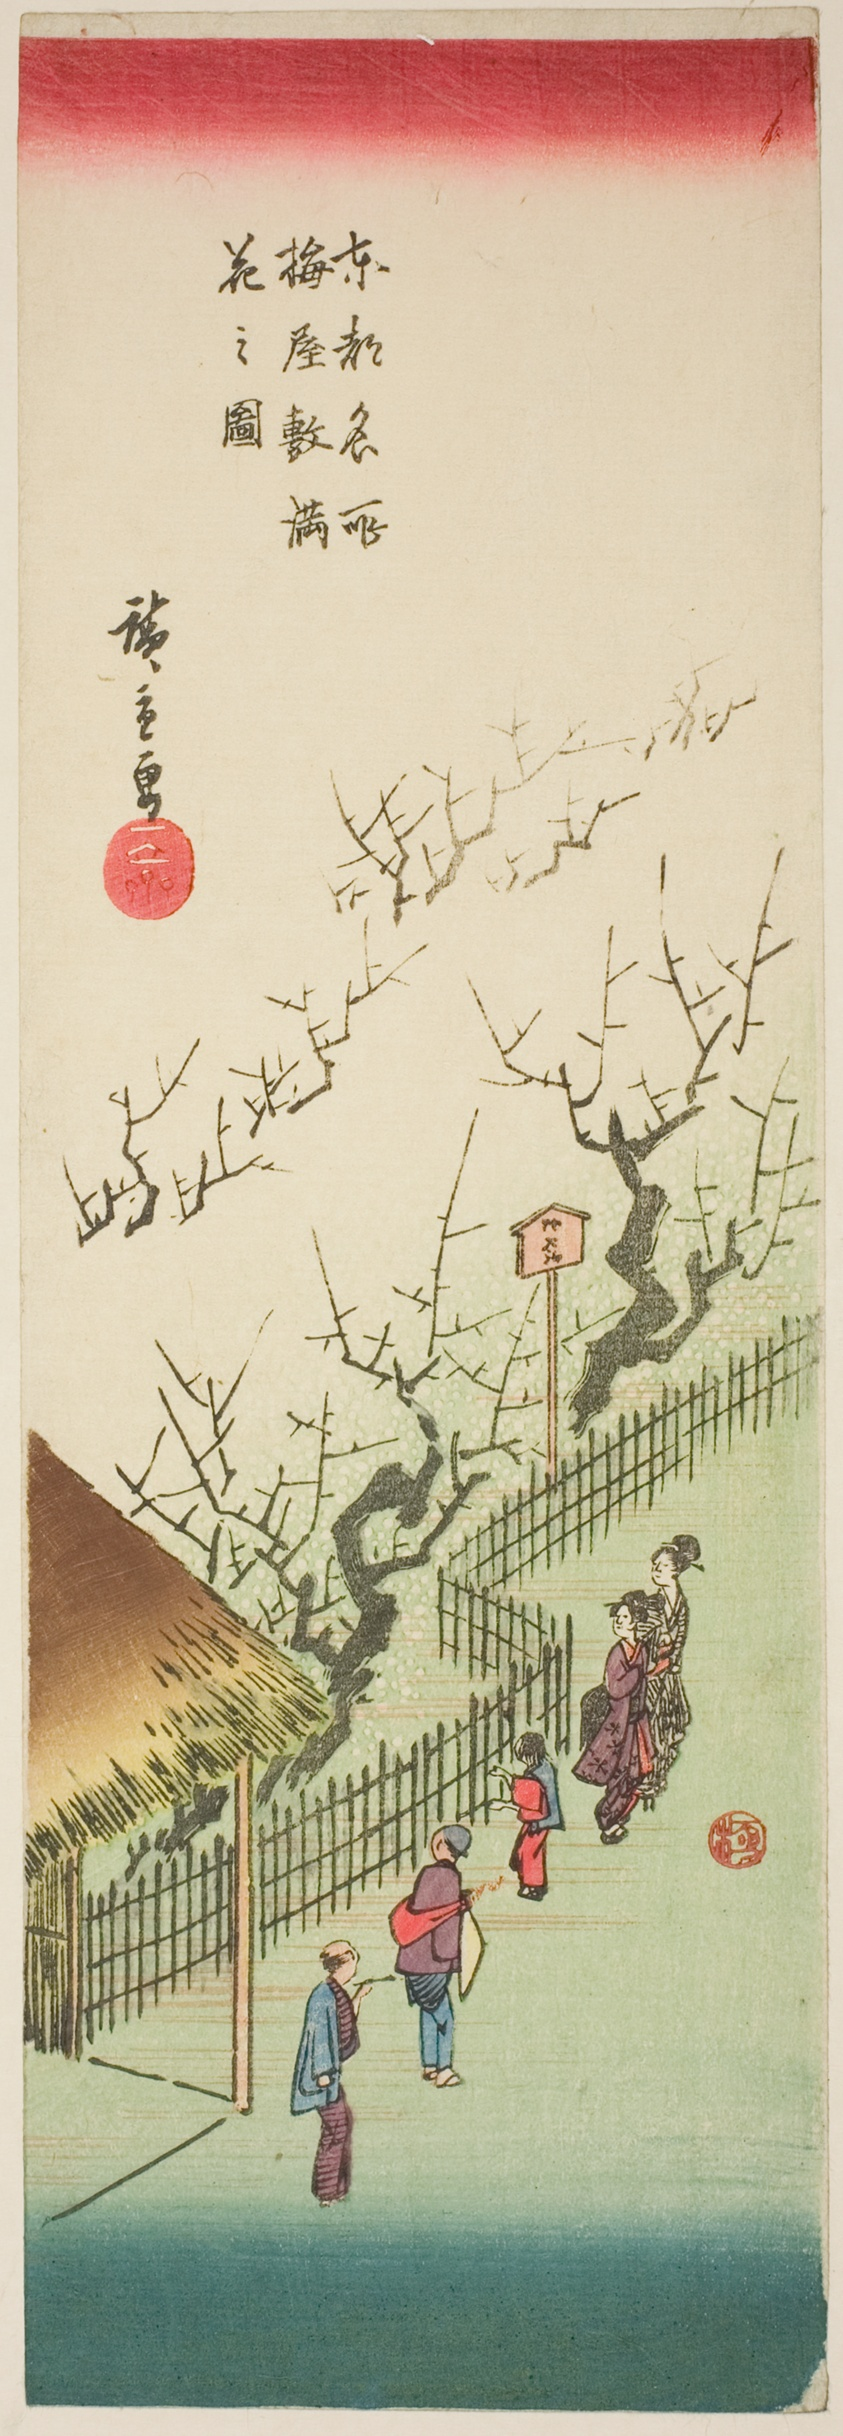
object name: Print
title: Plum Garden in Full Bloom (Ume yashiki manka no zu), from the series "Famous Views of the Eastern Capital (Toto meisho)"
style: Japanese (culture or style)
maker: Utagawa Hiroshige 歌川 広重; Japanese, 1797-1858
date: c. 1835/38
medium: Color woodblock print; chutanzaku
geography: Japan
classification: woodblock print; print; asian art